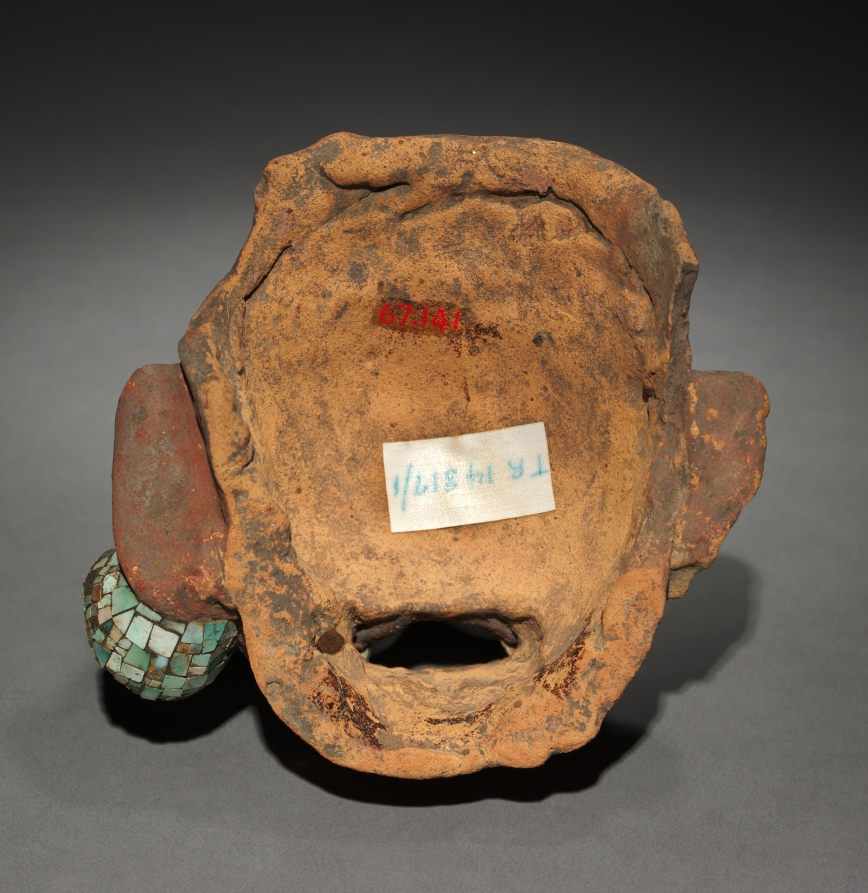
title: Mask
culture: Mesoamerica (or Mexico), 16th century or earlier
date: before 1519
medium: turquoise and terracotta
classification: Sculpture